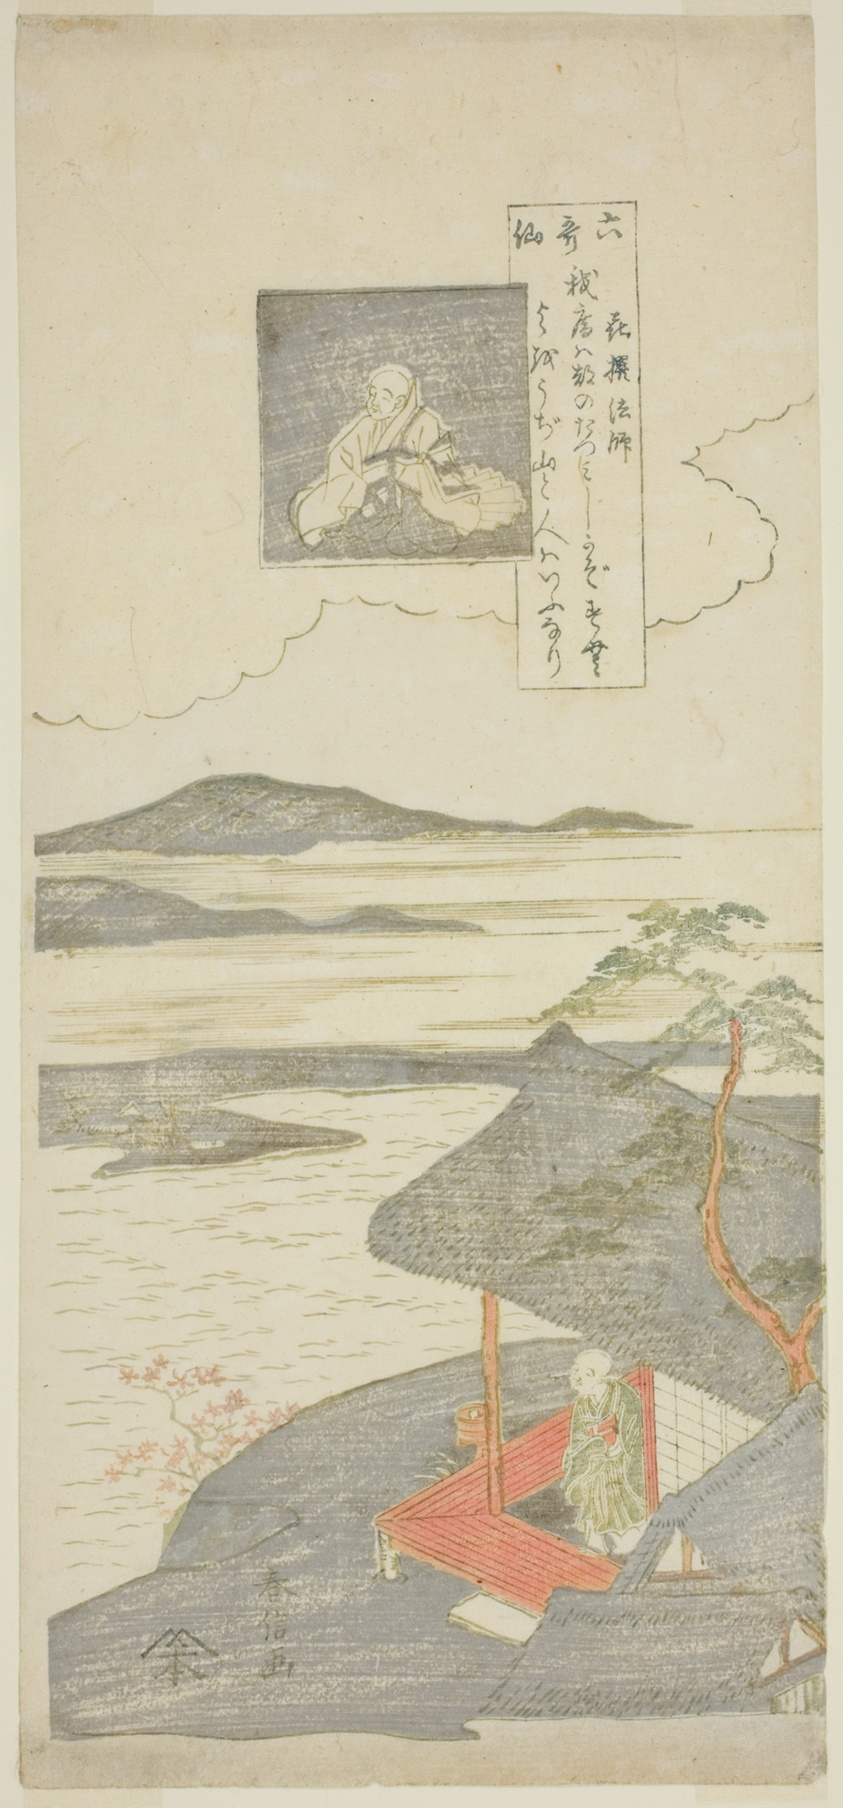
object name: Print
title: Poem by Kisen Hoshi, from the series "Six Famous Poets (Rokkasen)"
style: Japanese (culture or style)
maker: Suzuki Harunobu 鈴木 春信; Japanese, 1725 (?)-1770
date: c. 1764/65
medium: Color woodblock print; hosoban, mizu-e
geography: Japan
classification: woodblock print; print; asian art